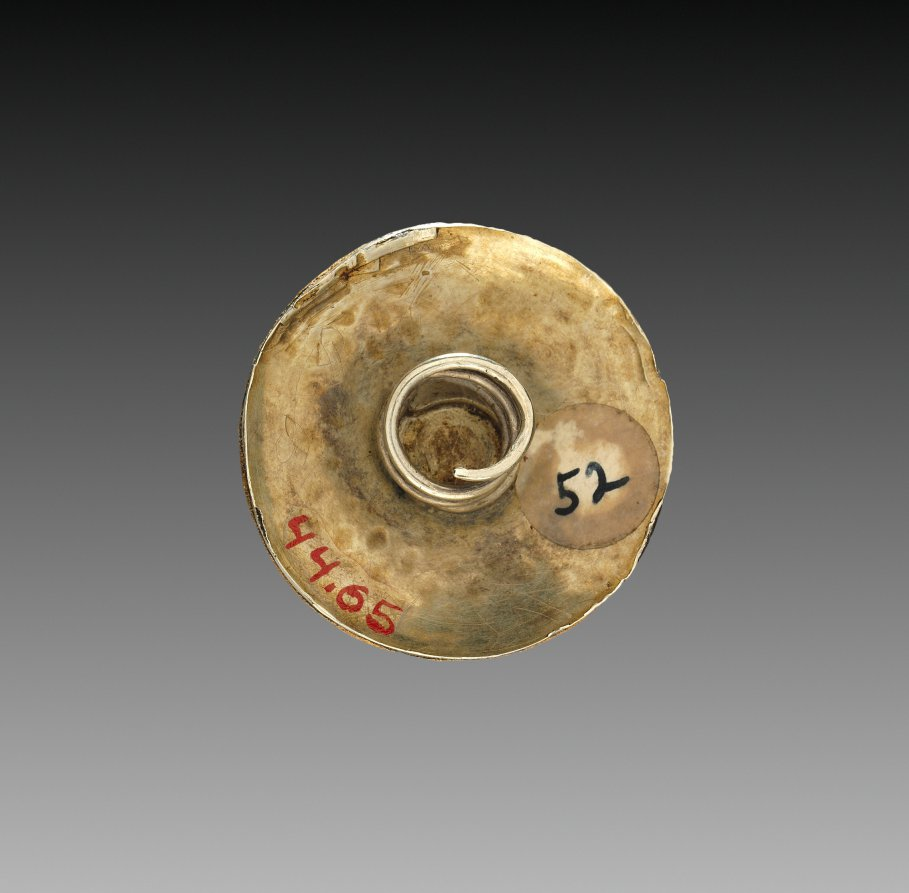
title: Hair Ornament, Jada Billi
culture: India, Jaipur, 17th century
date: 1600s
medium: gold, emerald and rubies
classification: Jewelry